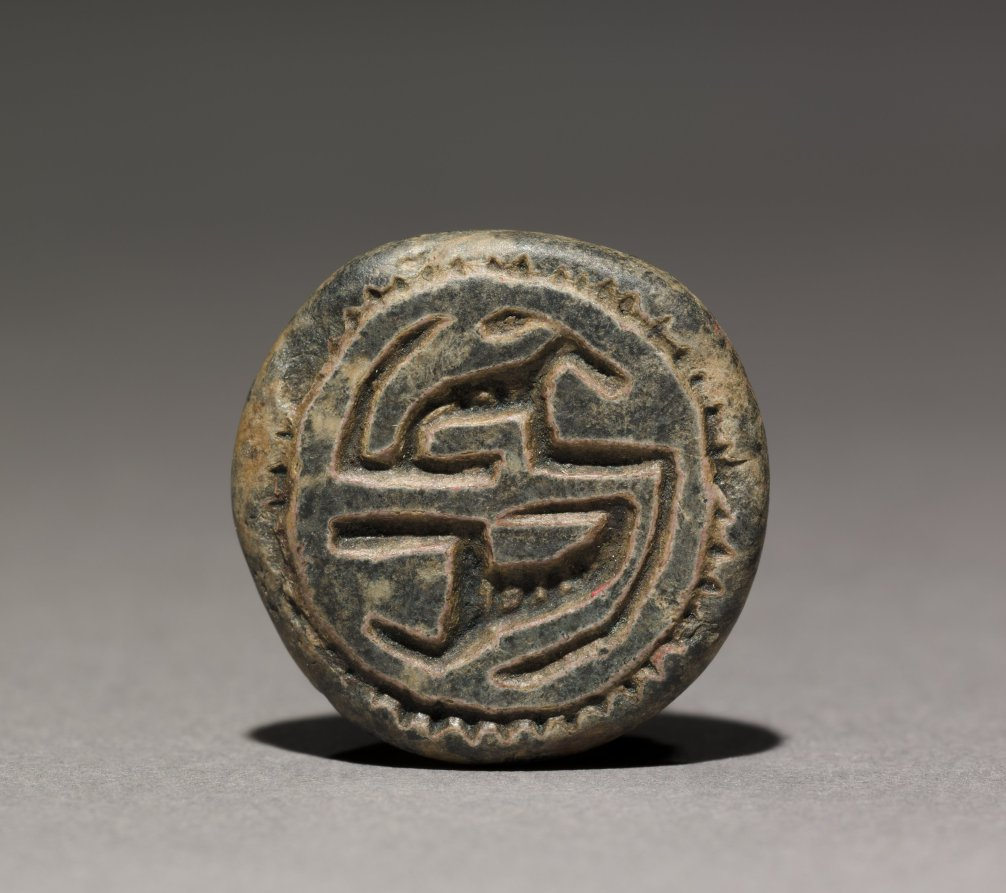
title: Seal Amulet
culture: Egypt, Old Kingdom (2647–2124 BCE), Dynasty 6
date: 2311–2140 BCE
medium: glazed steatite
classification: Amulets